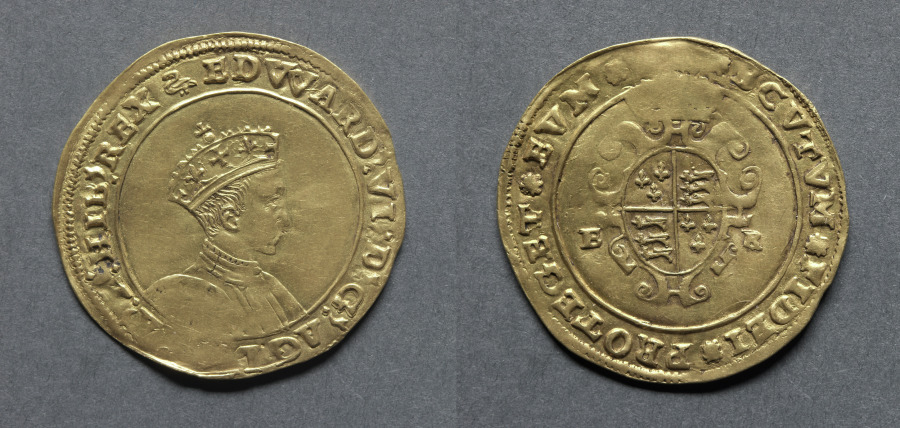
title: Half Sovereign: Edward VI (obverse); Crowned Royal Arms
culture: England, Edward VI, 1547-1553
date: 1549–50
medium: gold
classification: Coins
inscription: EDWARD. VI. D. G. AGL FRA. Z. HIBER. REX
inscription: SCUTUM DIFEI PROTEGET EUM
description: This Half Sovereign was struck at the Tower mint. Here the king is shown crowned, unlike a similar example also in the collection, 1969.175.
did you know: Edward VI was crowned king of England in 1547 was he was nine years old.